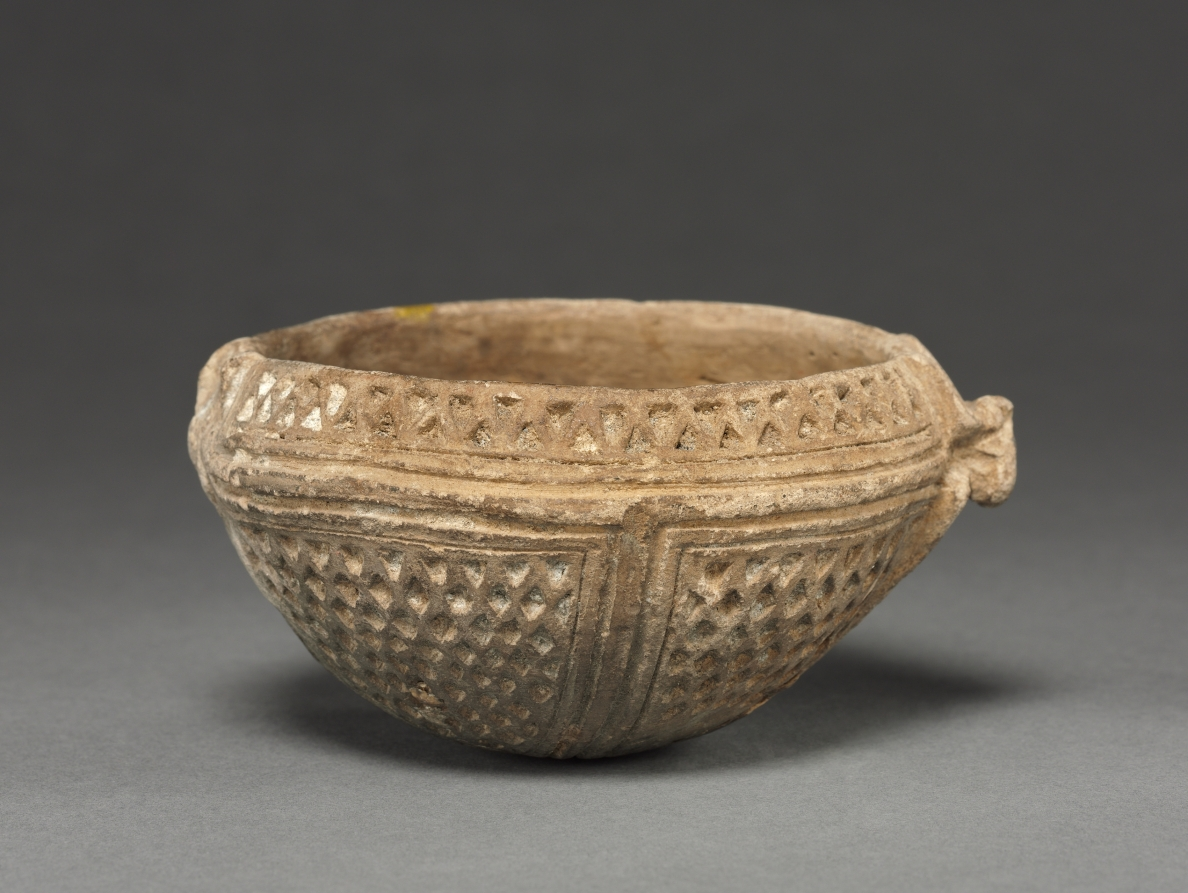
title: Jar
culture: Colombia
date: before 1550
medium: red ware with incised patterns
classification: Ceramic